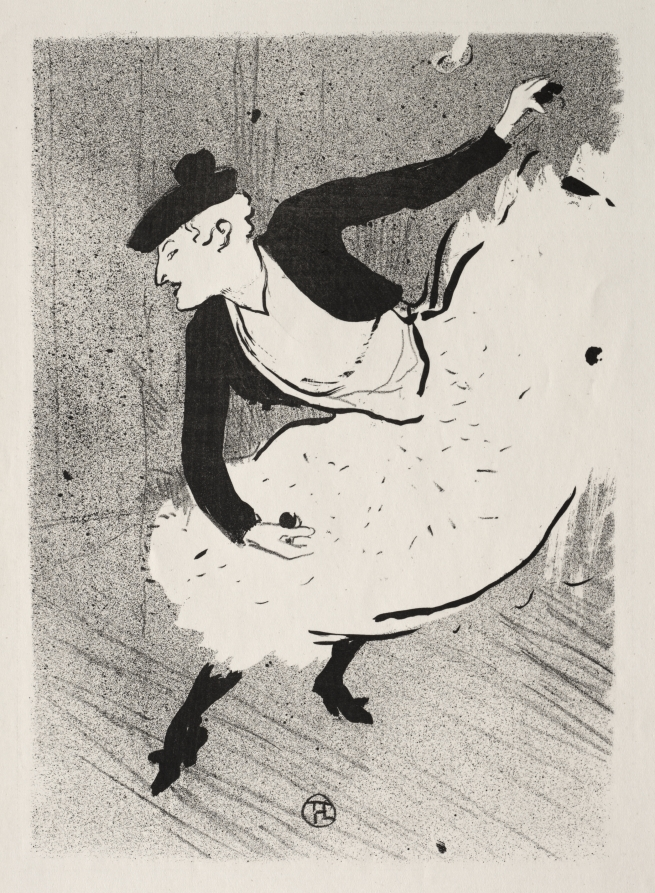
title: Edmée Lescot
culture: France, 19th century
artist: Henri de Toulouse-Lautrec (French, 1864–1901)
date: 1893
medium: lithograph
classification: Print